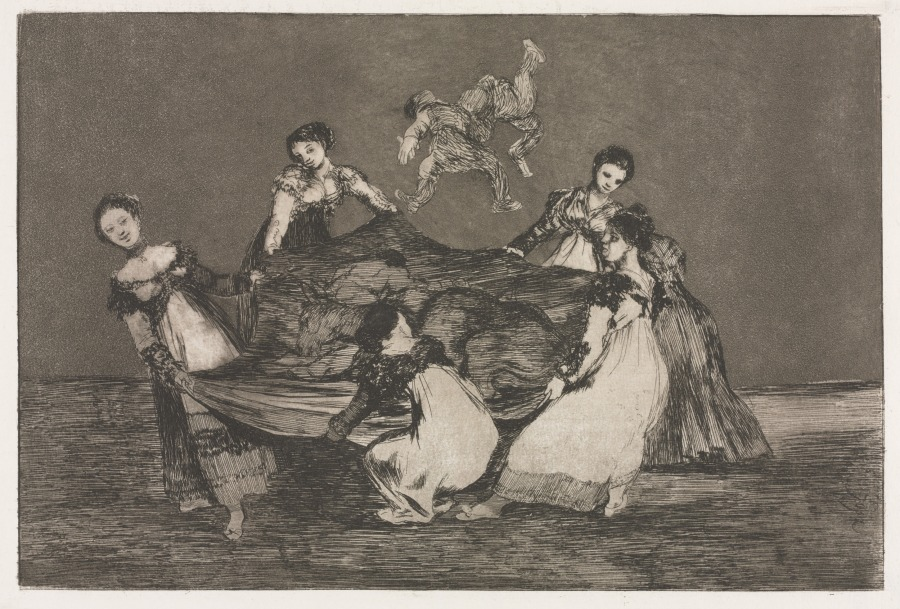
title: The Proverbs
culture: Spain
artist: Francisco de Goya (Spanish, 1746–1828)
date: 1864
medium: etching and aquatint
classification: Print